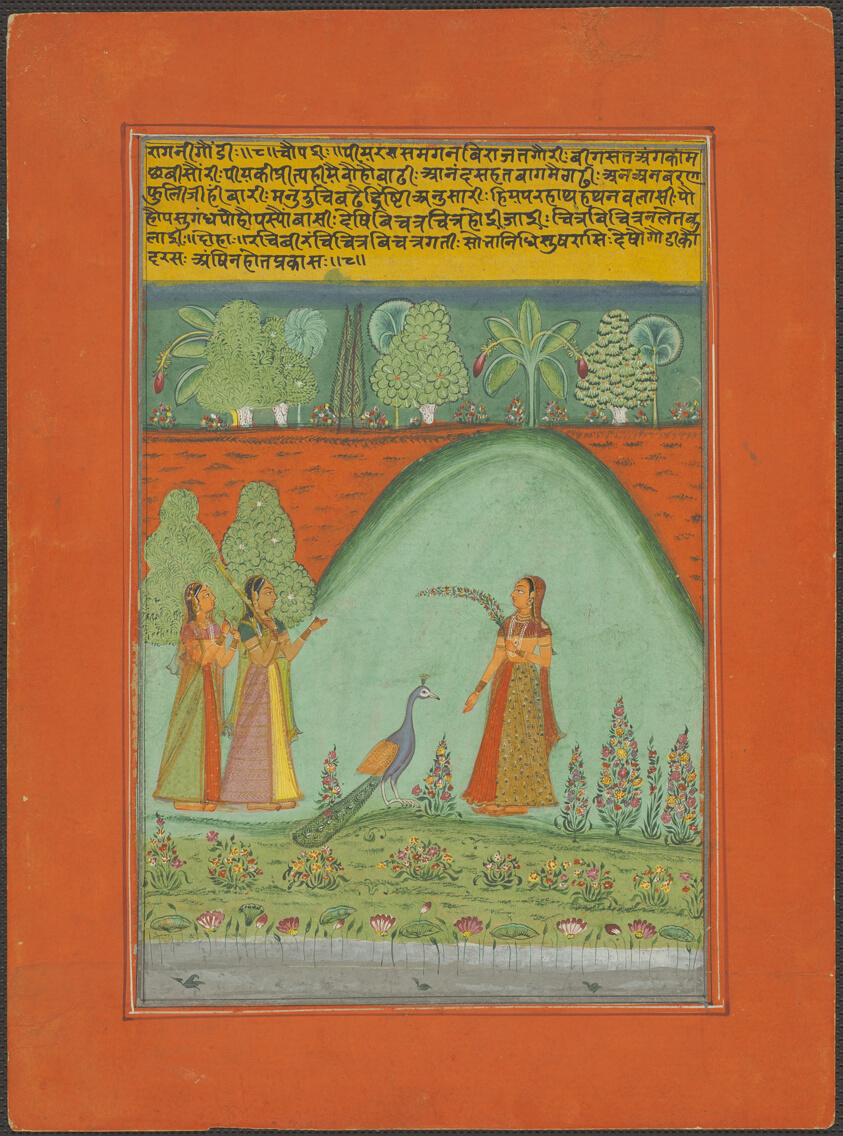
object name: Painting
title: Ragini Gaudi, Page from a Jaipur Ragamala Set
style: South Asian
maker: India; Rajasthan, Jaipur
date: c. 1750-1770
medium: Opaque watercolor and gold on paper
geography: Rajasthan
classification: miniature painting; painting; asian art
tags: music, musicians